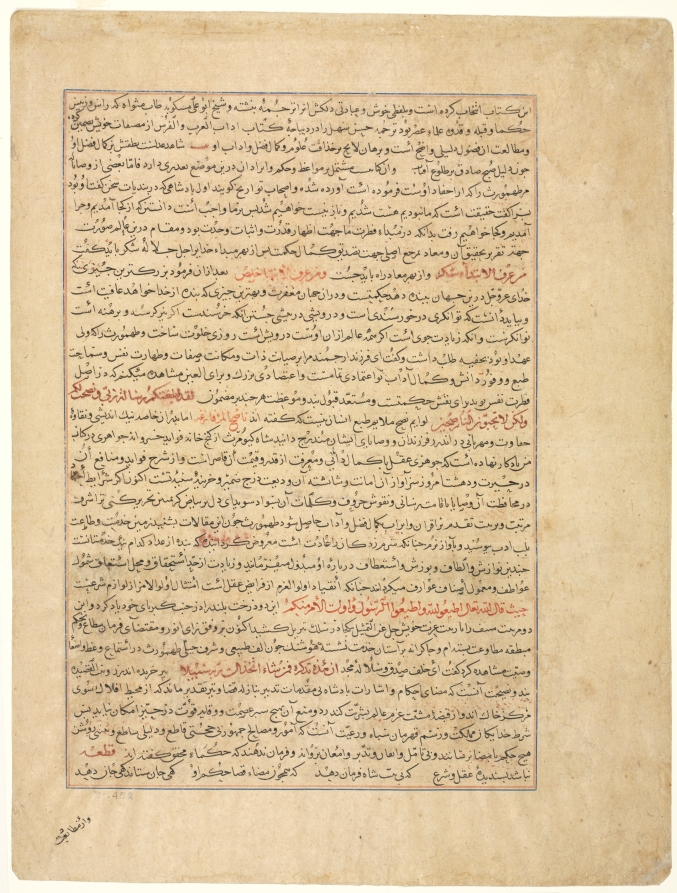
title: Text Page, Persian Prose, (verso), from Majmac al-Tavarikh (A Compendium of Histories) of Hafiz-i Abru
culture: Afghanistan, Herat, Timurid period (1370–1501)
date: c. 1425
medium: ink and opaque watercolor on paper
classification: Manuscript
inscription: script: Naskh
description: These two pages are from a manuscript that evidently was written and illustrated for the library (at Herat) of the Timurid king Shah Rukh, the son of Timur (Tamerlane). The Majma' al-Tawarikh traced the history of the world, beginning with the prophets of the Old Testament until the reign of Shah Rukh.